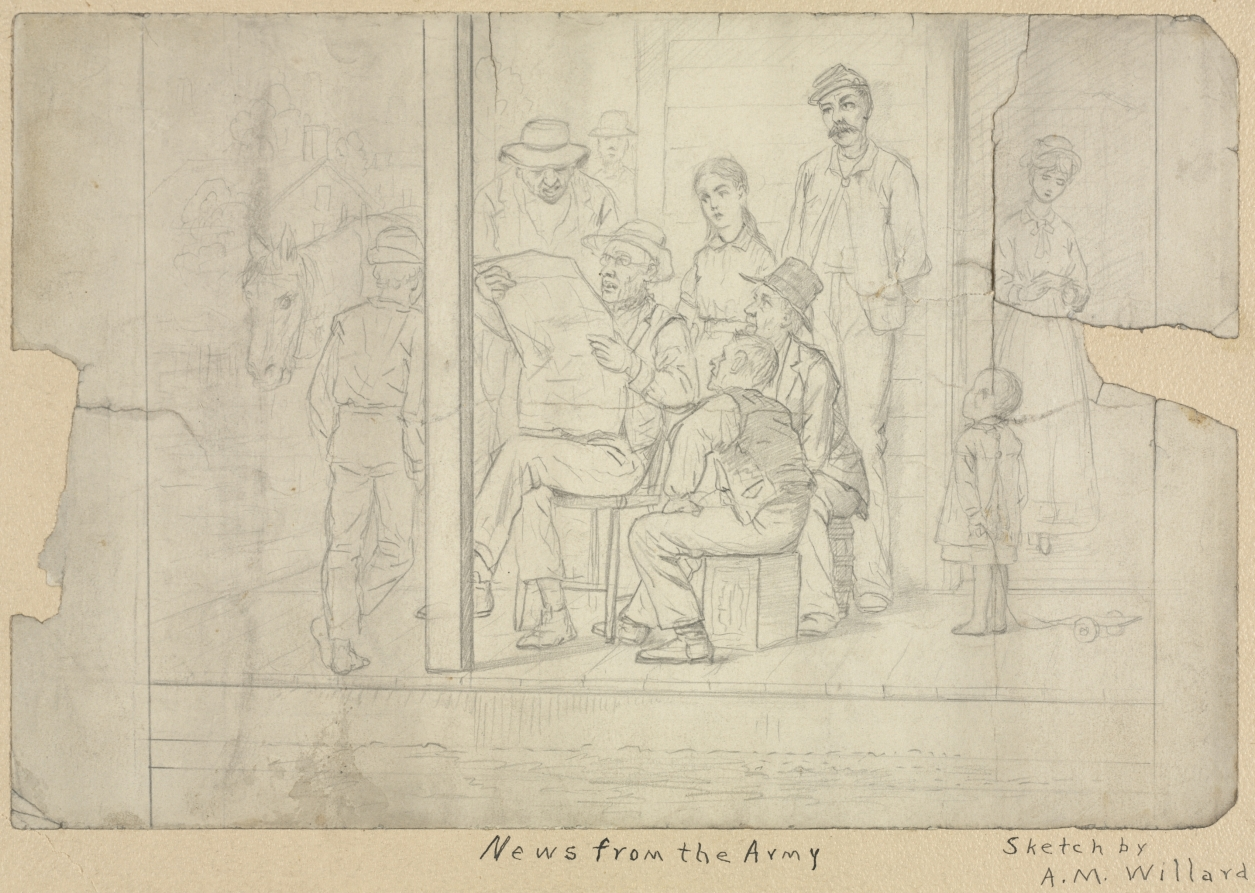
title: Sketch - News from the Army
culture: America, Ohio, Cleveland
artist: Archibald Willard (American, 1836–1918)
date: 1800s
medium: pencil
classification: Drawing